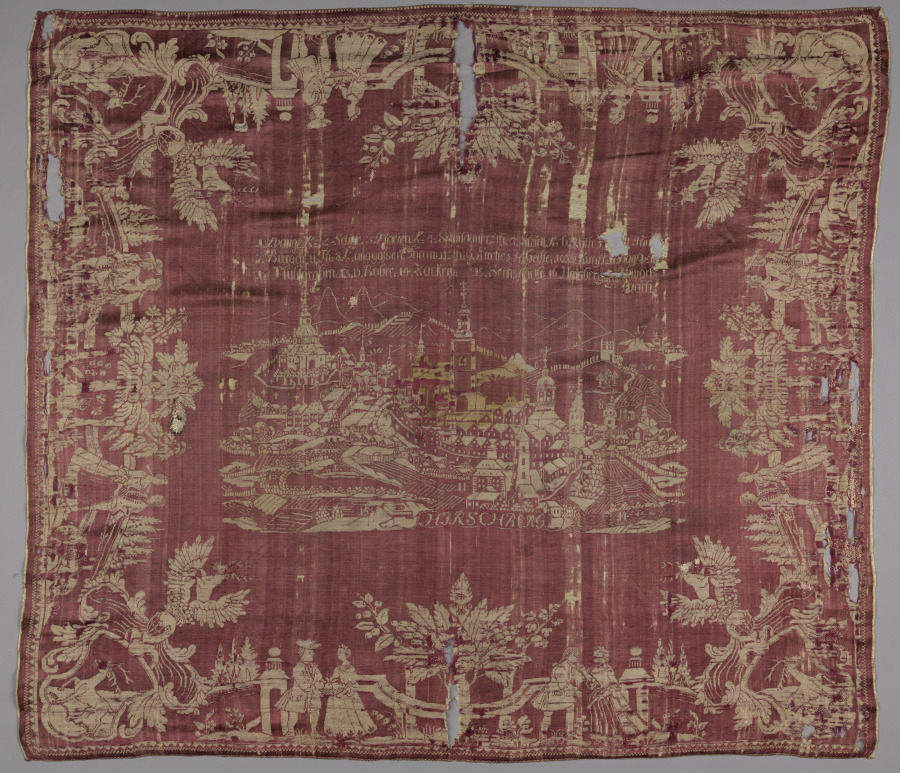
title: Square of Silk Damask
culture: Germany, Silesia ?, 18th century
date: 1700s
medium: satin weave; silk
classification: Textile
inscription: in the center, the principle buildings and landmarks of Hirschberg are numbered as follows and correspond to the list above: "1. Evange. K[irche]. 2. Schule. 3. Marienk[irche]. 4. Schüsdauer Th[urm]. 5. Stadt. K[irche]. 6. Rath Haus Thurm. 7. Burgch[anze] u[nd] Th[urm]. 8. Langgassen Thorm[auer] u[nd] Th[urm]. 9. Kirche z[um] H[eilige] Geiste. 10. W. Kunst. 11. Magazin. 12. Mühlgraben. 13. D. Bober. 14. Zachen. 15. Sechsstädte. 16. Hausberg. 17. Schwarzbach.